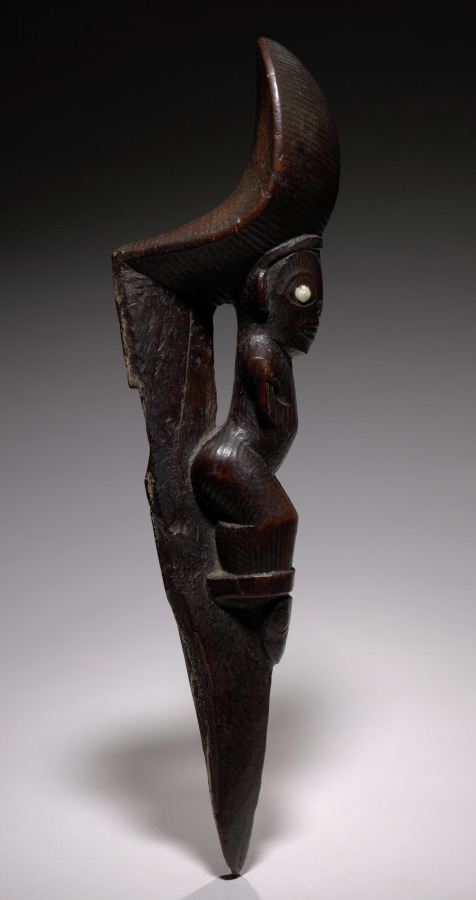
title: Stilt Footrest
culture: Polynesia, Marquesas Islands, 19th century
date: early 1800s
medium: wood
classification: Sculpture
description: Stilt walking and knockdown stilt contests were favorite forms of amusement and competition on the Marquesas Islands. The decorated footrest was secured to a six-foot stilt pole by wrapping sennit fiber cord through a wide slit at the carved figure's back and around the pointed end. Champion stilt walkers competed with those from other tribes during great festivals. Special artists carved the footrests from hardwood and cured them in the mud of a taro patch.